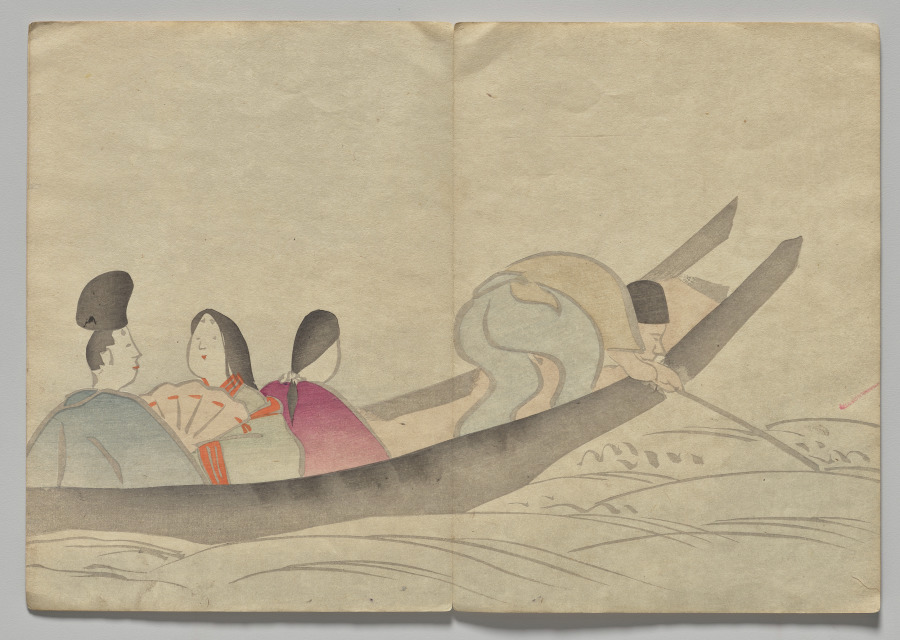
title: Scene from The Kōrin Picture Book (Volume 2)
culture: Japan, Edo period (1615–1868)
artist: Nakamura Hōchū (Japanese, d. 1819)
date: 1800s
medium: color woodblock printed book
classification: Bound Volume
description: Ogata Korin (1658-1716) was one of the most admired artists of Rimpa, or "decorative school painting." These books by the charming later-generation Rimpa artist Hochu record Korin's inventive designs.